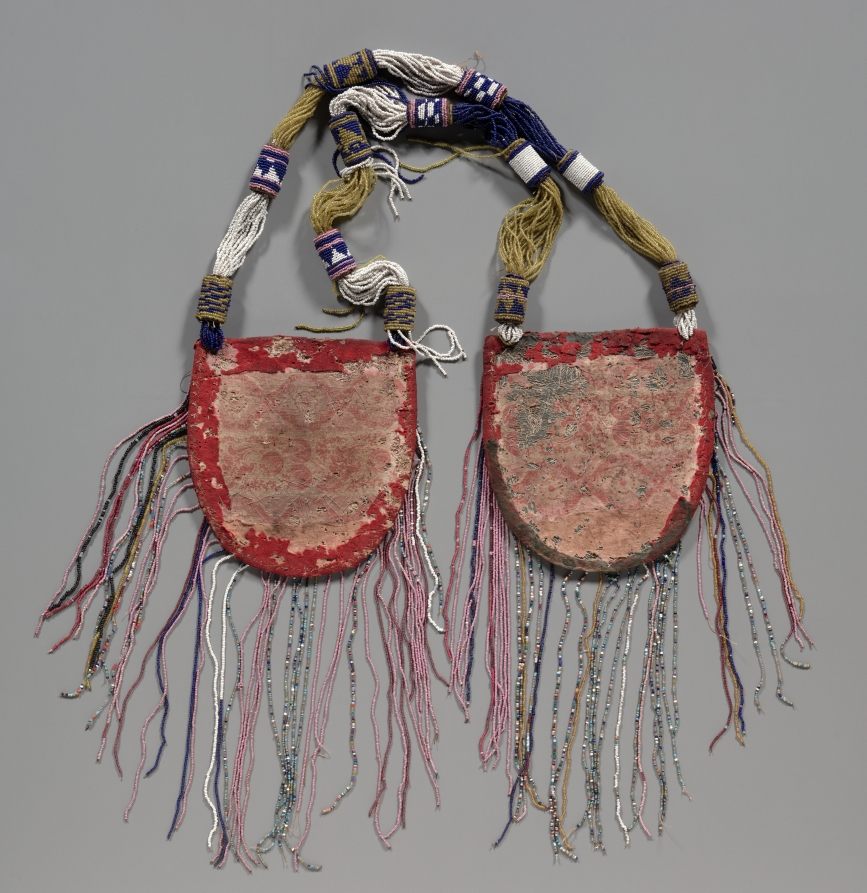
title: Ifá diviner's necklace (òdìgbà Ifá)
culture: Africa, West Africa, Nigeria, Yorùbá-style maker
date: 1900s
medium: Cloth, glass beads, cardboard, cotton, probably wool, and wood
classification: Implements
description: The use of colorful glass beads adds luster to the divination session and underlines the high status diviners enjoy in Yorùbá society. Like kings, diviners derive their authority from the otherworld, òrún. A beaded necklace with two beaded pouches is an accessory carried by the itinerant Yorùbá diviner. Substances sewn into the miniature bags protect the diviner and ensure his power.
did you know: Look closely at the minuscule beads used to make the complex patterns of this multicolored necklace containing two pouches with thin strands that are connected by rope-like cords. A Yoruba diviner would have communicated with the spirit world while wearing this accessory.